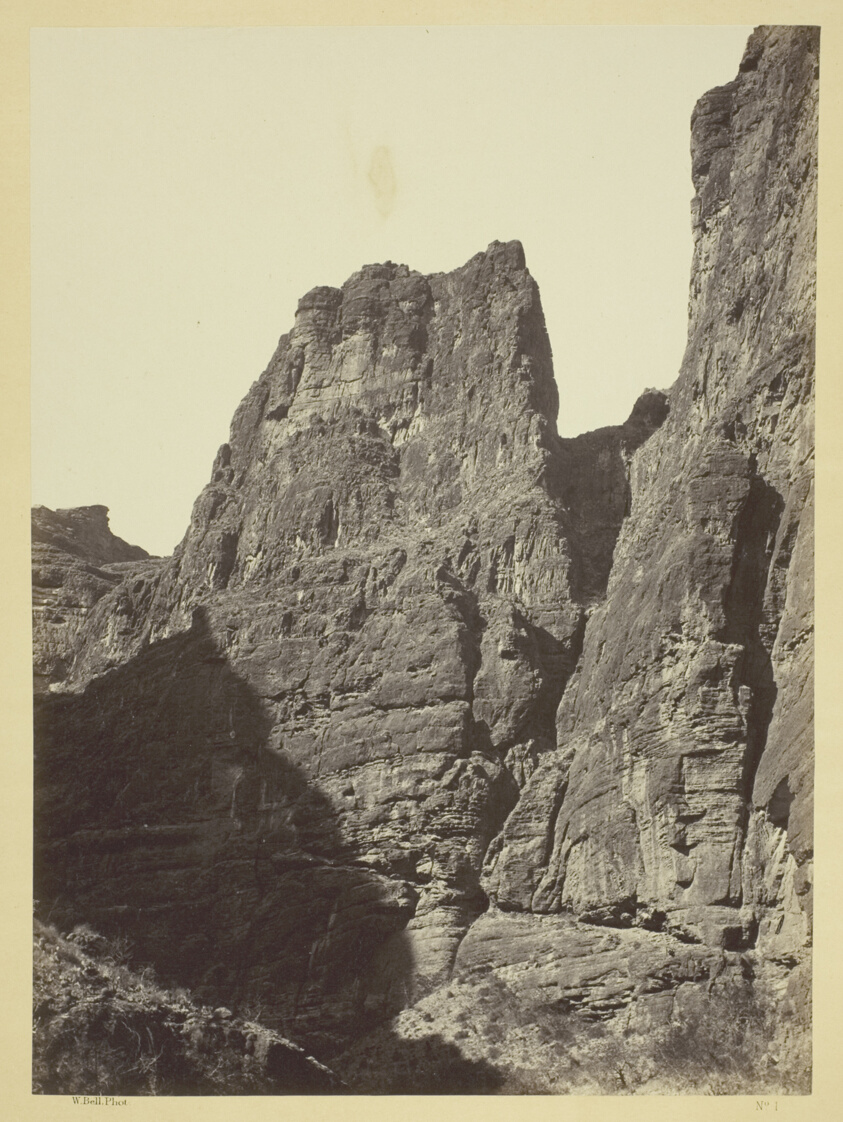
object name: Photograph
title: Cañon of Kanab Wash, Colorado River, Looking South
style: 19th century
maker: William H. Bell (American, 1830–1910)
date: 1872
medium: Albumen print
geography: United States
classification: albumen print from collodion negative; photograph; photography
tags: Collected by Hugh Edwards